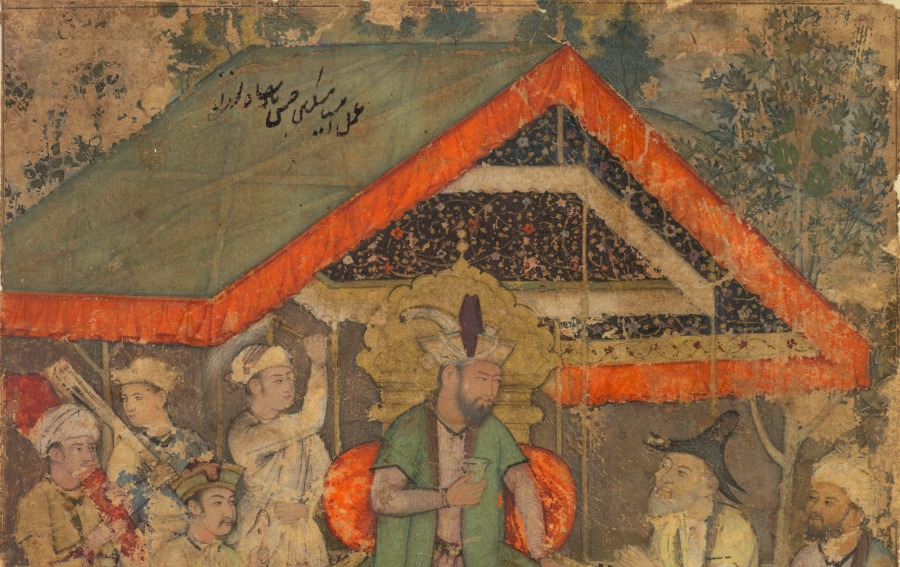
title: An Ambassador before Humayun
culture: Mughal India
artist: attributed to Miskin (Indian, active 1570s–c. 1604)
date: c. 1610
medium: Gum tempera and gold on paper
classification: Painting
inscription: Persian inscription at upper left probably added c. 1700s, in nasta‘liq script: the work of the master Miskin / Great King Hasan . . .]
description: Humayun, the second Mughal emperor of India, son of Babur and father of Akbar, is enthroned in an outdoor royal encampment. The scene recalls Humayun’s 15 years of exile between 1540 and 1555, many of which he spent traveling through Pakistan, Afghanistan, and Iran, after an Afghan rebel ousted him from India.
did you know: Humayun wore a special type of turban, his Taj-i Izzat (Crown of Power and Glory).